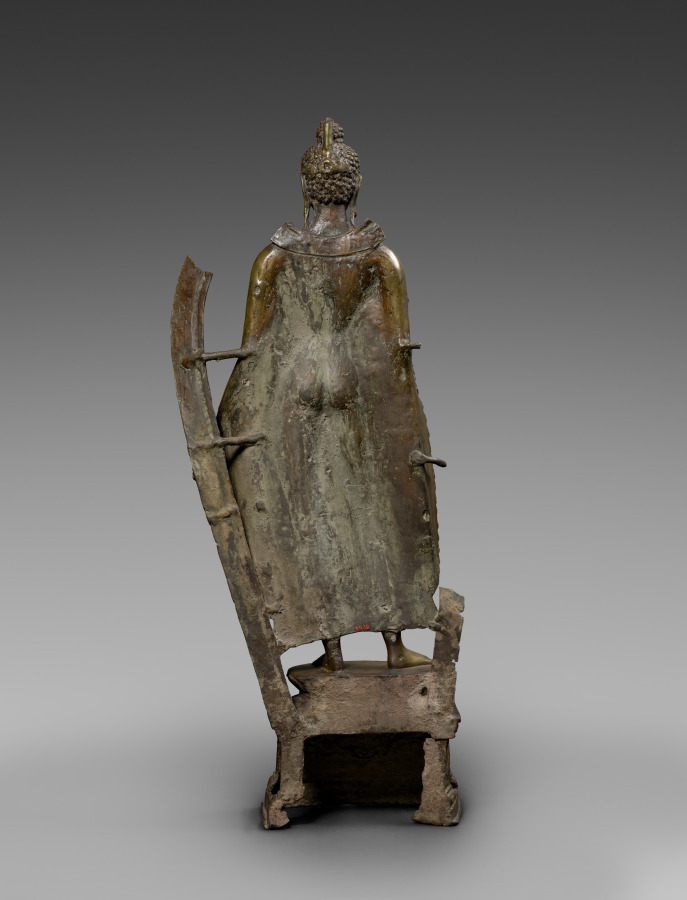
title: Standing Buddha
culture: India, Kashmir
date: c. 900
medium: brass with silver and copper inlay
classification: Sculpture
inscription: inscribed with the name of the monk who owned it: Lhatsun Nagaraja (active from c. 998 to 1026)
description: The slender athletic Buddha extends one foot slightly off the lotus pedestal, suggesting his humanity enters our world from his transcendent state. With his right hand he signals that we should have no fear. The smooth signs of wear on the sculpture indicate that it was worshiped in Kashmir, where water and other ablutions were poured over sacred images during rituals. The Tibetan inscription on the pedestal states that it belonged to a royal monk named Nagaraja (Tibetan, active about 998–1026). Sculptures like this contributed to the transmission of Buddhism from India to Tibet and served as artistic models.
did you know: The Buddha grasps the end of his robe in his left hand.